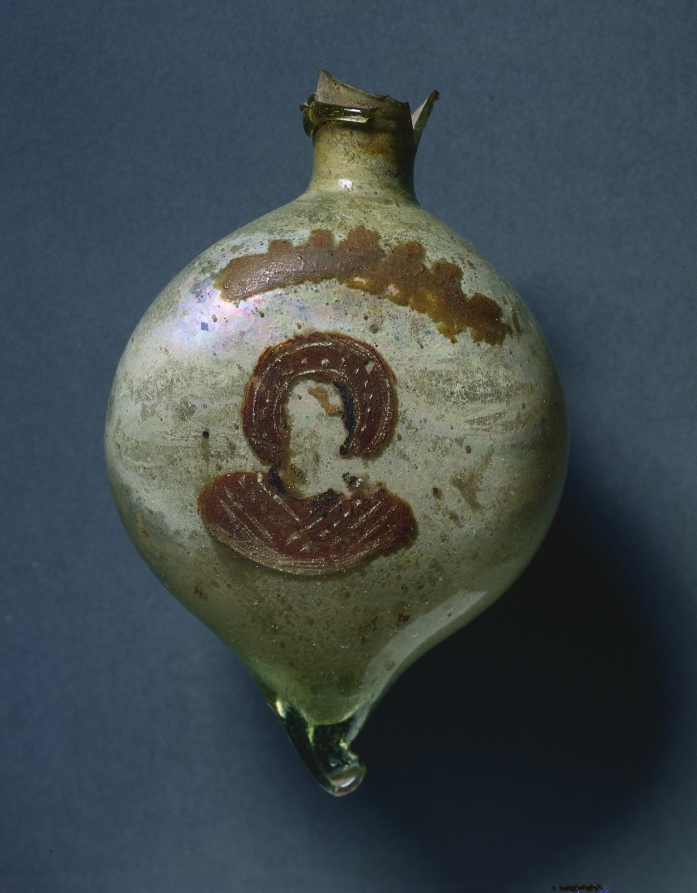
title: Pilgrim's Flask with Nimbed Figure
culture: Byzantium, Syria-Palestine, Byzantine period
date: c. 400–600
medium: opaque glass with paint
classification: Glass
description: Ampullae (small flasks) from pilgrimage sites were made of metal, terracotta, or glass. Because of their fragility, glass ampullae survive less abundantly than the other materials. This example was painted with the image of an unidentified saint bearing a nimbus or halo. It must have been used in conjunction with this saint's shrine.